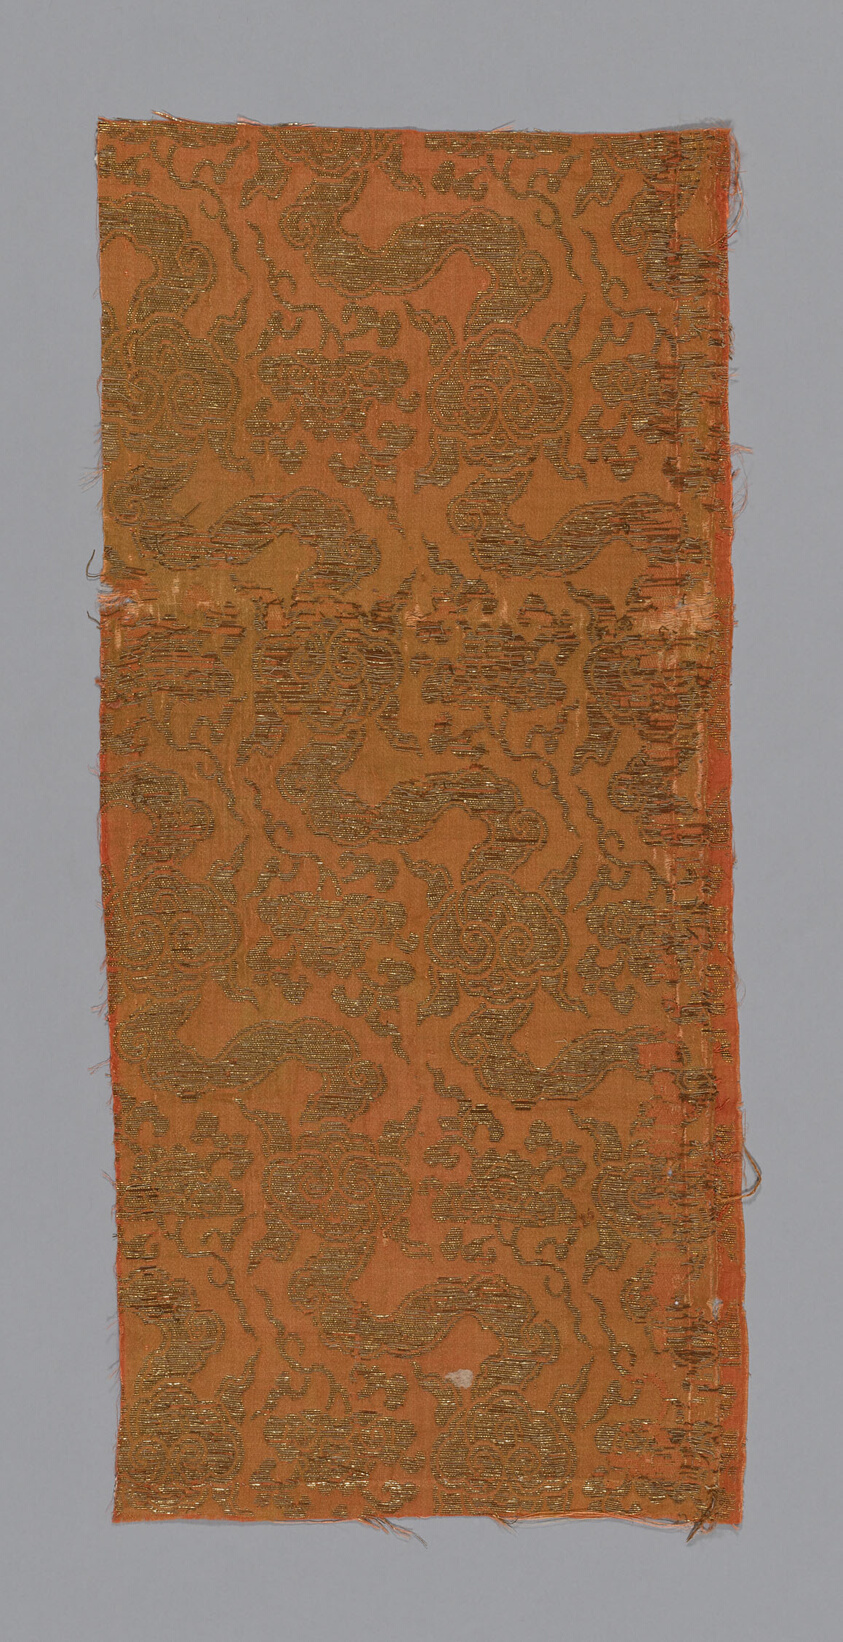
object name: Textile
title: Fragment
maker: Japan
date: 18th century, late Edo period (1789–1868)/ Meiji period (1868–1912)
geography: Japan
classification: textile; weaving